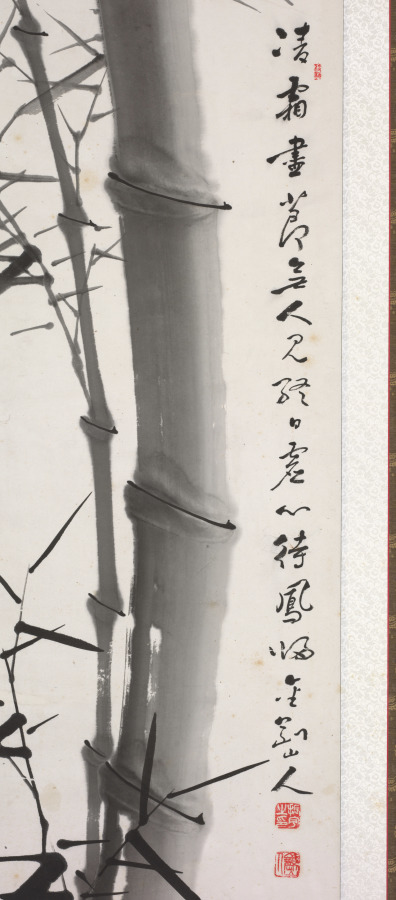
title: Bamboos in Wind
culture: Korea, Japanese colonial period (1910−1945)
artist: Kim Jin-woo (Korean, 1883–1950)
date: 1934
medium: Ten-panel folding screen; ink on paper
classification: Painting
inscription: Two chops stamped on each panel: 振宇之印 (Jinwoo’s Seal); 金剛山人 (Diamond Mountain Man)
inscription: Inscription written on the far-left panel: 甲戌流??寫於竹林堂金剛山人振宇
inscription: Inscription written on the 8th panel: 五百間淸風金剛山人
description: Active during the Japanese colonial period in Korea (1910–45), the artist Jin-woo Kim earned his artistic reputation for his expressive renditions of bamboo swaying in a strong wind. His piercing bamboo shoots are often compared to an iron spear, and their sharp leaves to a knife. It is believed that he deliberately emphasized sharpness in his brushstrokes to express his strong resistance against Japanese colonial oppression.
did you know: The artist’s prolific artistic production were a major part of fundraising efforts to support resistance activities for Korea’s independence.